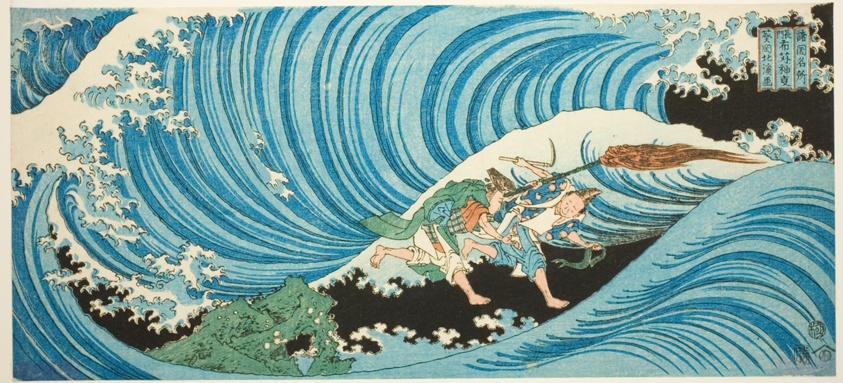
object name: Print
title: The Seaweed-gathering Ritual in Nagato Province (Nagato mekari no shinji), from the series "Famous Places in the Provinces (Shokoku meisho)"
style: Japanese (culture or style)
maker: Totoya Hokkei (Japanese, 1780–1850)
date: c. 1834/35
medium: Color woodblock print; horizontal otanzaku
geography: Japan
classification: woodblock print; print; asian art